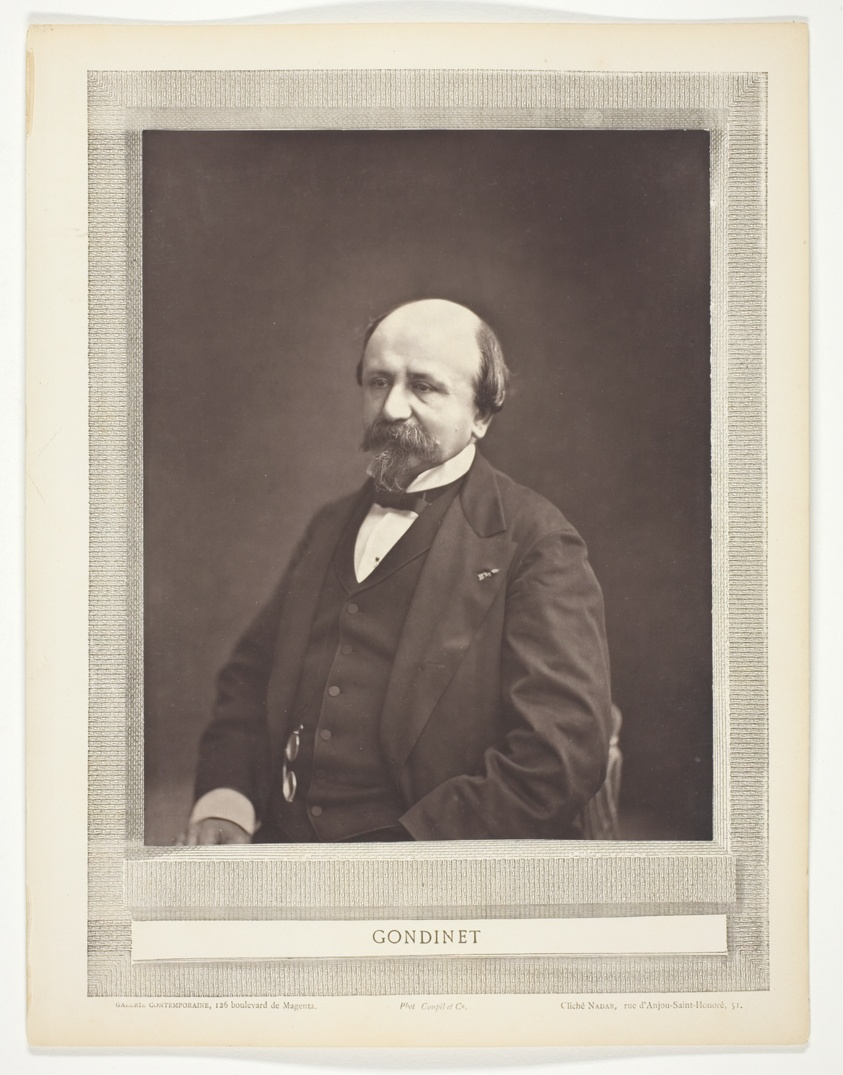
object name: Photograph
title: Gondinet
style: 19th century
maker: Nadar (Gaspard Félix Tournachon) (French, 1820–1910)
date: 1853/76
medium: Woodburytype, from the periodical “Galerie Contemporaine Littéraire, Artistique” (1876), volume 3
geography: France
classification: woodburytype; photomechanical process; photography; photograph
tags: Collected by Hugh Edwards, Contemporaine Littéraire